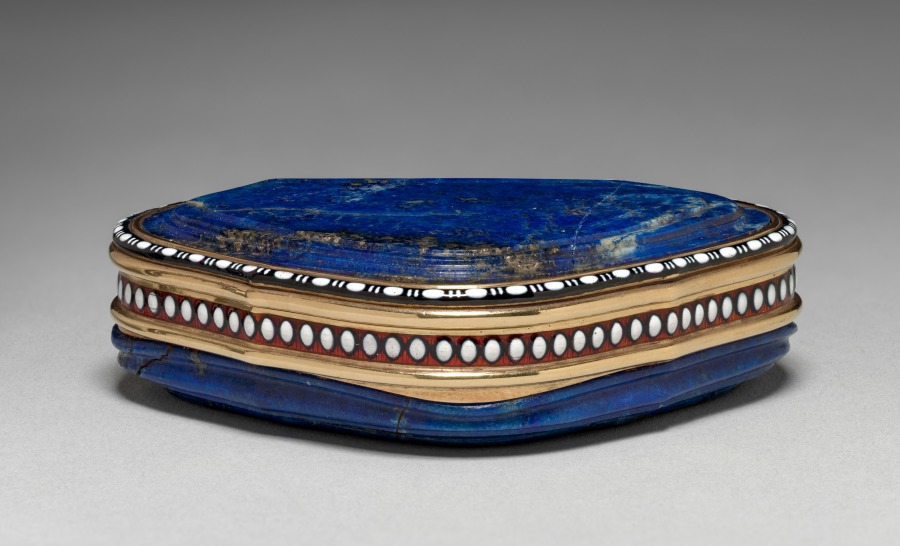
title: Snuff Box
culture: Germany, Dresden (?), mid-18th century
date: mid-1700s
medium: lapis lazuli with enameled gold mounts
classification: Miscellaneous